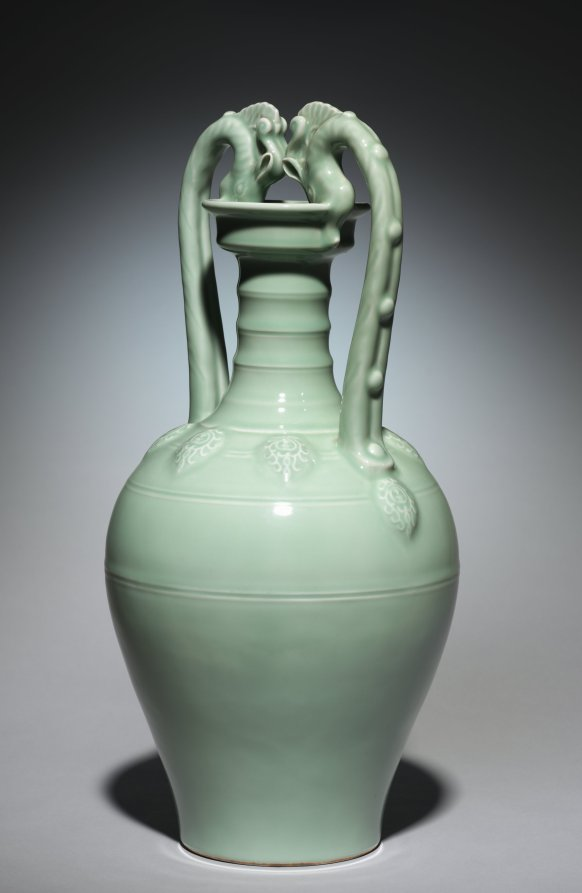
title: Amphora Vase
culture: China, Jiangxi province, Jingdezhen, Qing dynasty (1644-1911), Yongzheng mark and period (1723-35)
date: 1723–35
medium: porcelain with celadon glaze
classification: Ceramic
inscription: Yongzheng mark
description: This elegant vase, modeled in the shape of an amphora with dragon handles has perfect symmetry. Its celadon glaze is of exceptional purity and of subtle green color, all characteristics of classical Yongzheng-era monochrome porcelains. The amphora shape and dragon handles of this vase, seen earlier in the glazed stoneware of the Sui and Tang dynasties (581-907), were revived during the Yongzheng period for achieving "antique-elegance" (guya) in aesthetics as well as technical perfection in ceramic art. Only four vases of this size and glaze are known to exist.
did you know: The shape of the vase derives from Greece and was introduced to China via the Middle East.